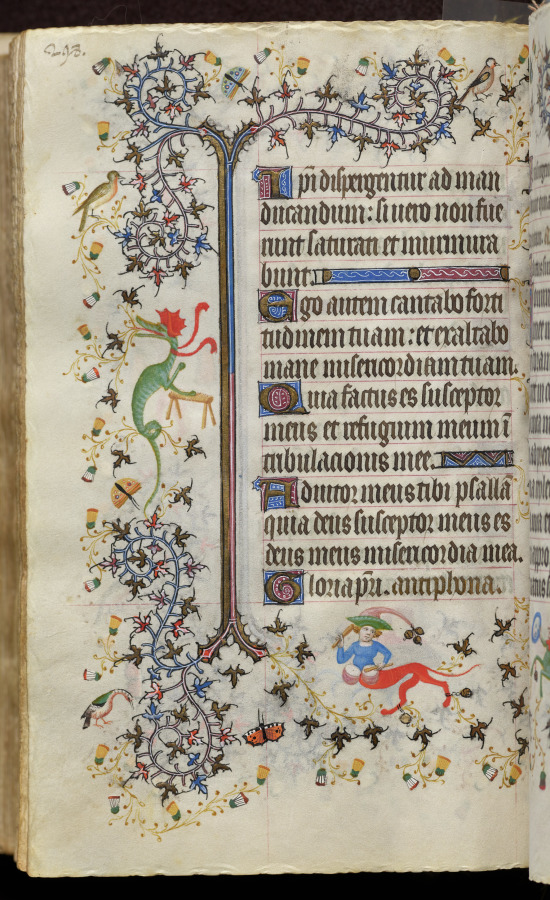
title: Hours of Charles the Noble, King of Navarre (1361-1425): fol. 149v, Text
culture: France, Paris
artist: Master of the Brussels Initials and Associates (French)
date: c. 1405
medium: ink, tempera, and gold on vellum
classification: Bound Volume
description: This precious volume was obviously highly prized by its owner, the French-born King of Navarre, who had his coat of arms painted on no less than twenty folios. Rather than directly commissioning this manuscript from a specific workshop, it seems that Charles the Noble acquired his book of hours -- perhaps ready-made for the luxury market -- while on a trip to Paris in 1404-05. A collaborative effort, six painting styles are evidenced within the pages of this codex, those of two Italians, two Frenchmen, and two Netherlanders. The painter who was responsible for the planning and decoration of the book, and who produced seventeen of the large miniatures, was a Bolognese artist known as the Master of the Brussels Initials. His principal assistant, responsible for most of the borders, was a Florentine who signed his name "Zecho" da Firenze on folio 208 verso.